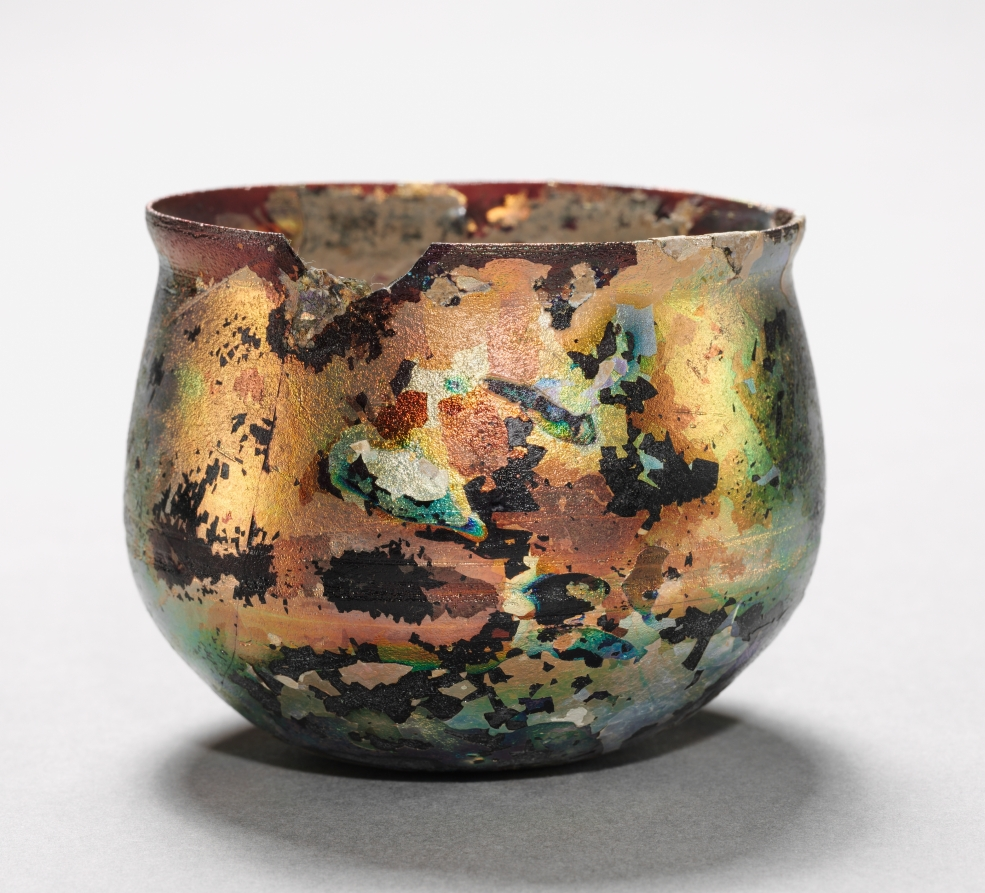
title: Goblet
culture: Italy, Roman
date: 100–300 CE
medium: glass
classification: Glass